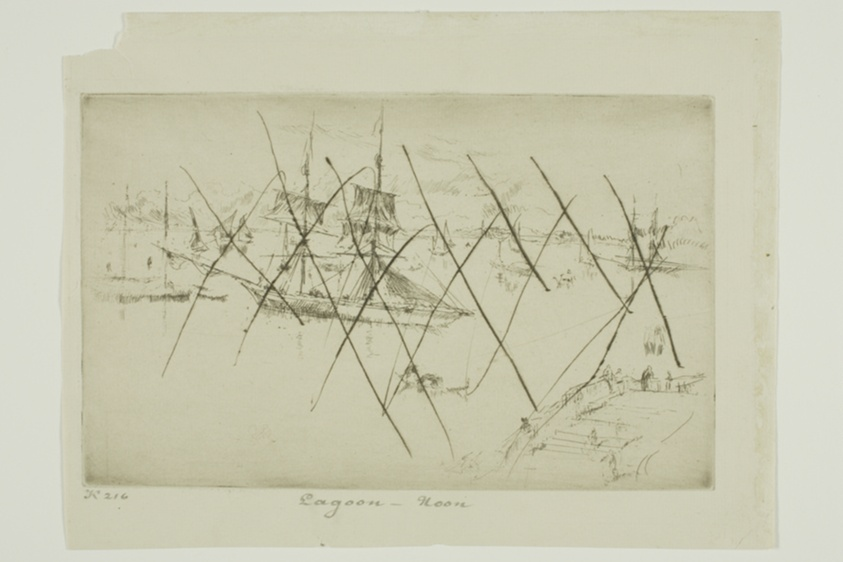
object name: Print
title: Lagoon - Noon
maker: James McNeill Whistler (American, 1834-1903)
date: 1879/80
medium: Etching and drypoint, with drypoint cancellation, in black ink on ivory laid paper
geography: United States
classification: etching; print; prints and drawing; drypoint; paper